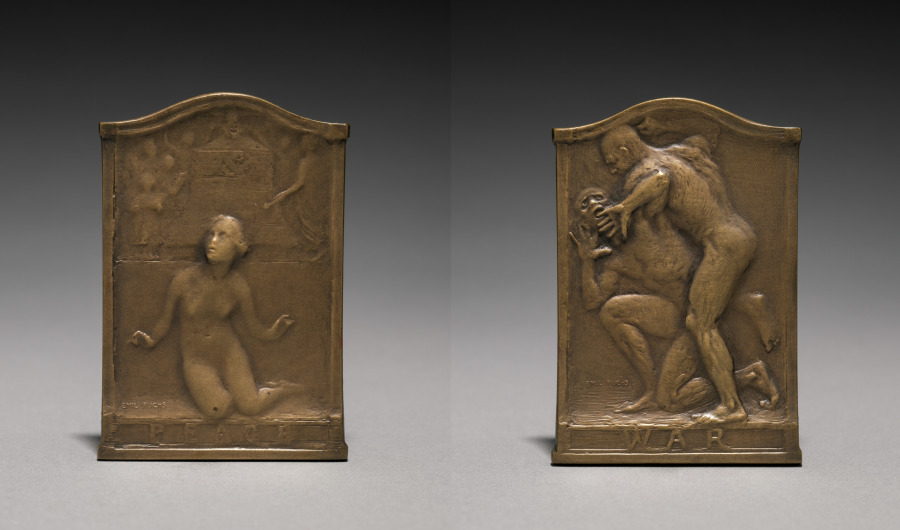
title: Medal: Commemorates the Signing of Peace, No. 40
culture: America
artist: Emil Fuchs (American, born Austria, 1866–1929)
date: 1918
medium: bronze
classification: Metalwork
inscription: "PEACE."